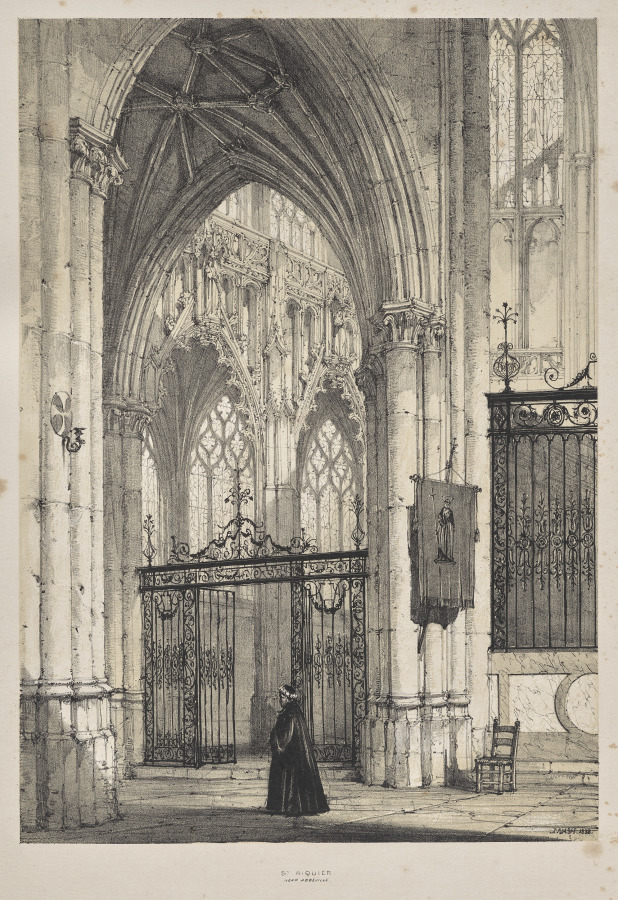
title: Architecture of the Middle Ages: Church of St. Riquier, near Abbeville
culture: England, 19th century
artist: Joseph Nash (British, 1808–1878)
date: 1838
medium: lithograph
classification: Print